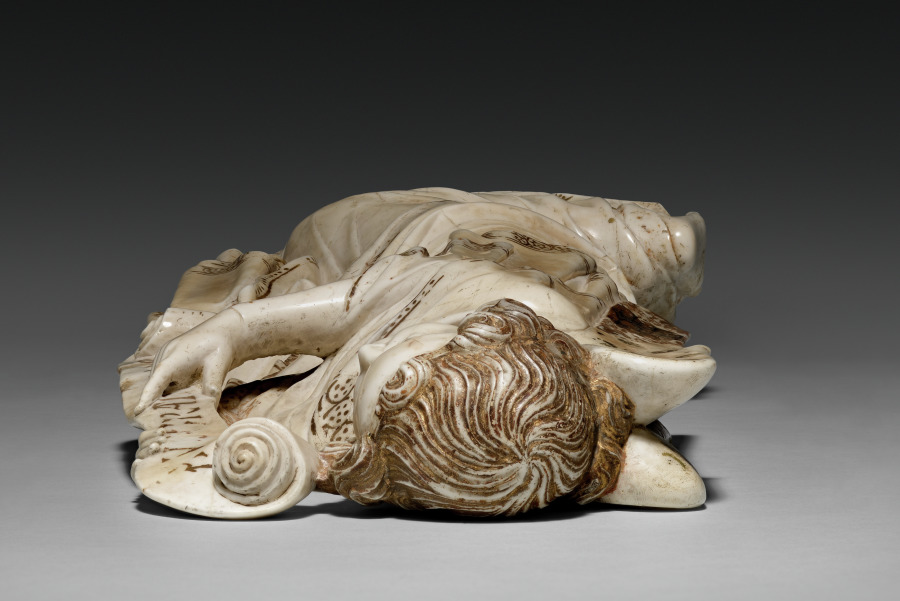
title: The Archangel Gabriel from an Annunciation Group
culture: France, Champagne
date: c. 1350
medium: alabaster with traces of paint and gilding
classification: Sculpture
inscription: Ave Maria, Gratia Plena.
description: In France, the use of alabaster began in the late 1200s for funerary monuments. The Archangel Gabriel, together with its counterpart, the Virgin Mary (now in the Louvre Museum, Paris) is part of an Annunciation. This is a rare example of alabaster sculpture from the 1300s. The alabaster comes from a quarry near Malaucène in Provence (France), making it an instance of long-distance trade of the rare material. Although the figure is very flat, it was likely made to also be viewed from the back, where there are remnants of gilding and the peacock feathers of the angel’s wing.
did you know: The surface of alabaster works can vary. By differentiating the intensity of polishing, it is possible for sculptures to create a surface with varying degrees of luster, or shine.